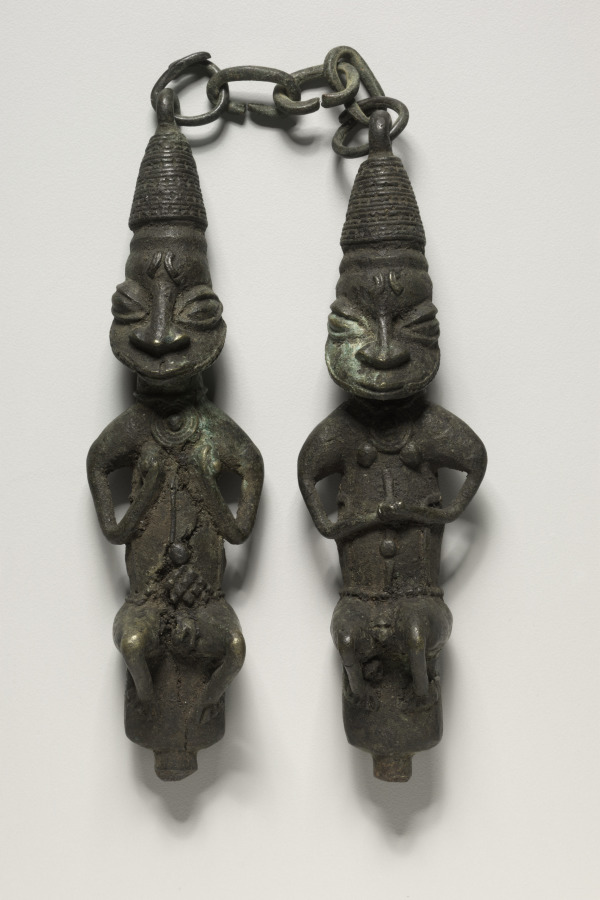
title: Pair of Ritual Staffs (ẹdan Ògbóni)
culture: Africa, West Africa, Nigeria, Yorùbá-style maker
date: possibly 1800s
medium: Copper alloy and iron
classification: Sculpture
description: The chain connecting these two figures allows them to be worn in public by a member of the Ògbóni or Òṣùgbó association as authority emblems. The male on the right gives the association’s typical salute by clasping his left fist on the right one, while the female on the left holds her breasts as a sign of welcome and generosity. The use of copper alloy and iron expresses Ògbóni/Òṣùgbó's concerns with longevity and durability.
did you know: Imagine how this would look when its owner wore it; the chain would go around the back of the neck and the figures would rest on their chest.